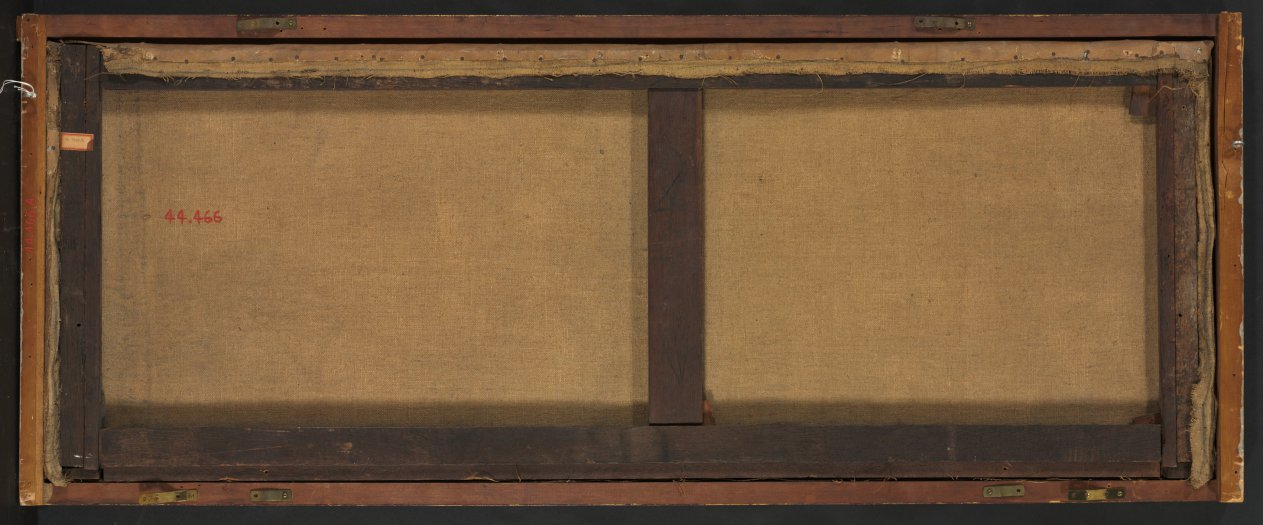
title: Overdoor Painting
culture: France, 18th century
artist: Pierre Rousseau (French, 1751–1829)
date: 1790s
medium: oil on canvas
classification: Painting